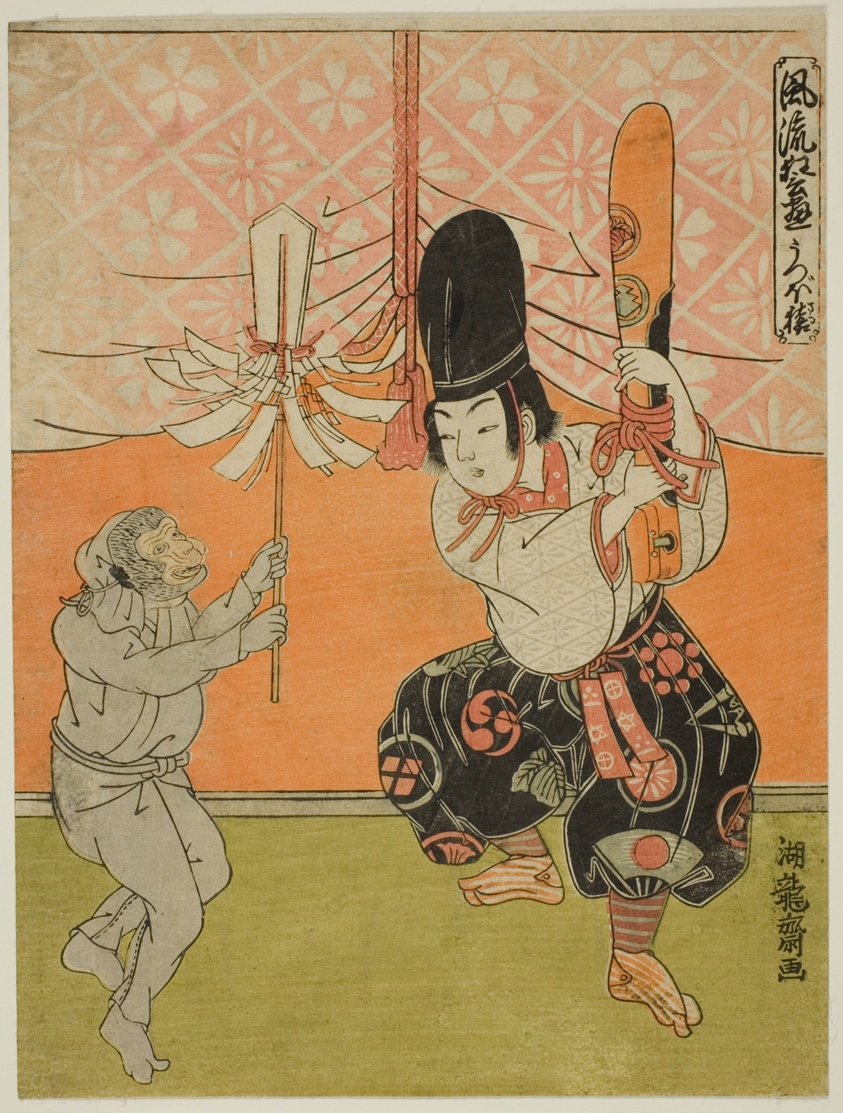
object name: Print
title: The Monkey's Quiver (Utsubo-zaru), from the series "Popular Kyogen Plays (Furyu kyogen asobi)"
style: Japanese (culture or style)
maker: Isoda Koryusai (Japanese, 1735-1790)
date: c. 1773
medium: Color woodblock print; chuban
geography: Japan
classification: woodblock print; print; asian art